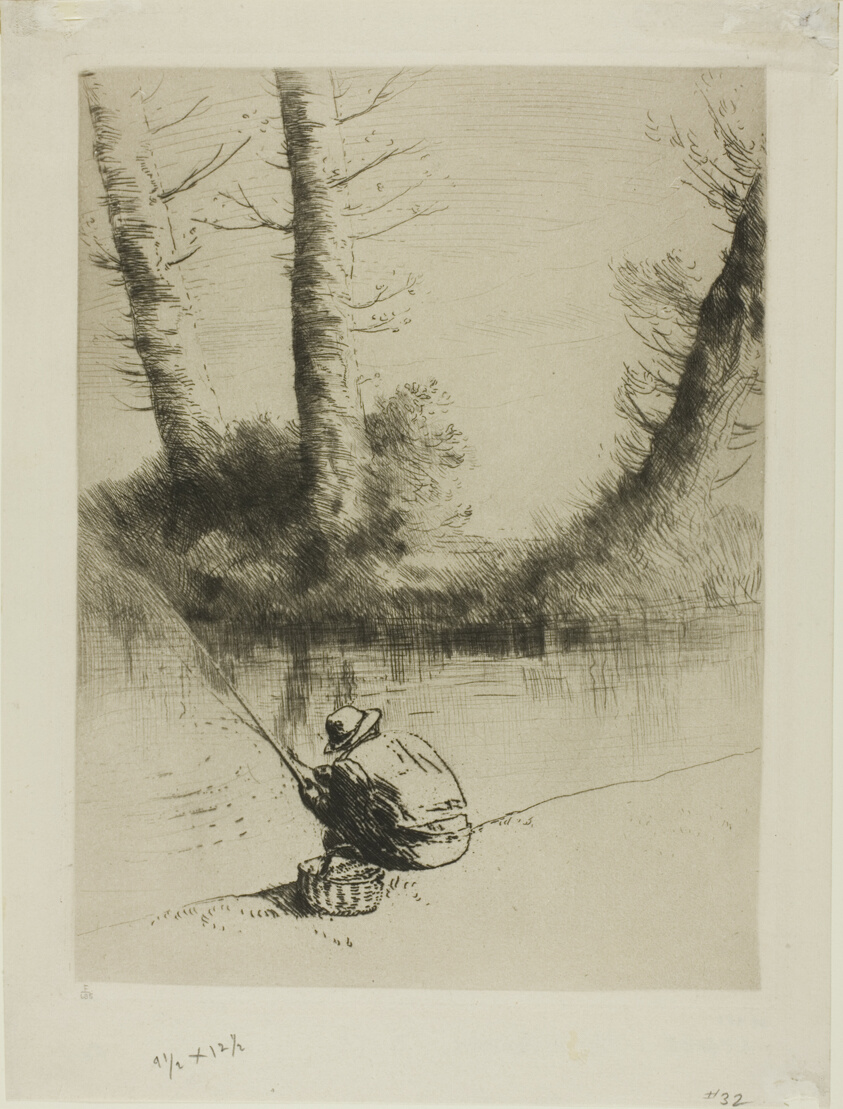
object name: Print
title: Pole Fisherman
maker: Alphonse Legros (French, 1837-1911)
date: 1878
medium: Etching, drypoint and plate tone on light gray laid paper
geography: France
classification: etching; print; prints and drawing